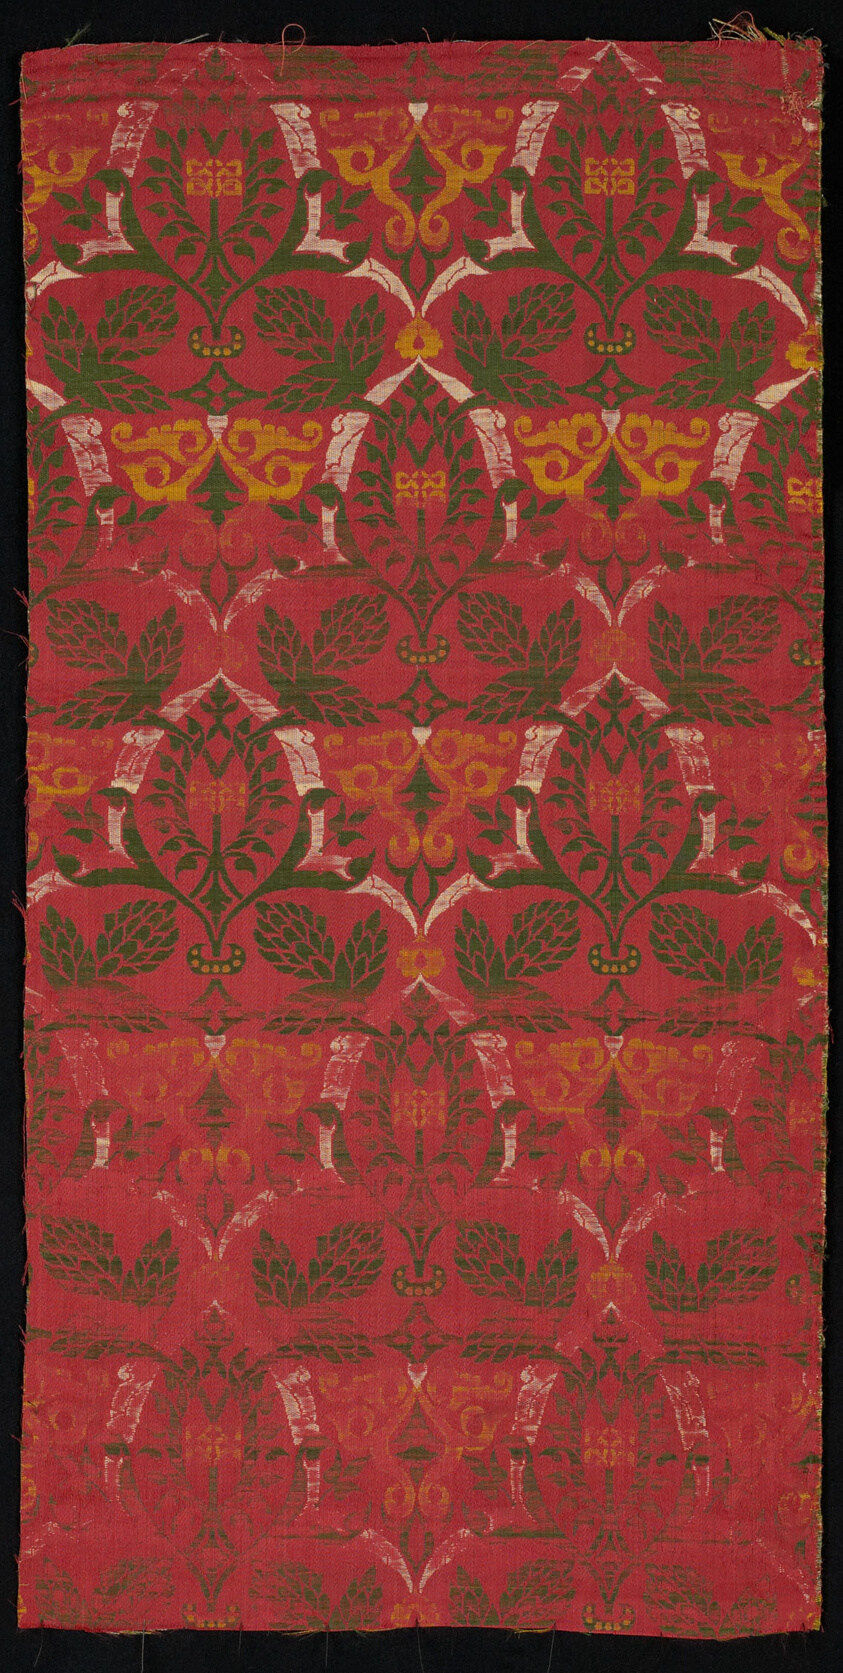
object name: Textile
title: Fragment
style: nasrid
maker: Spain; probably Granada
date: Nasrid dynasty (1230–1492), late 15th century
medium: Silk; lampas technique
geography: Spain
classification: textile; weaving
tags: arabesque, plant-derived motif